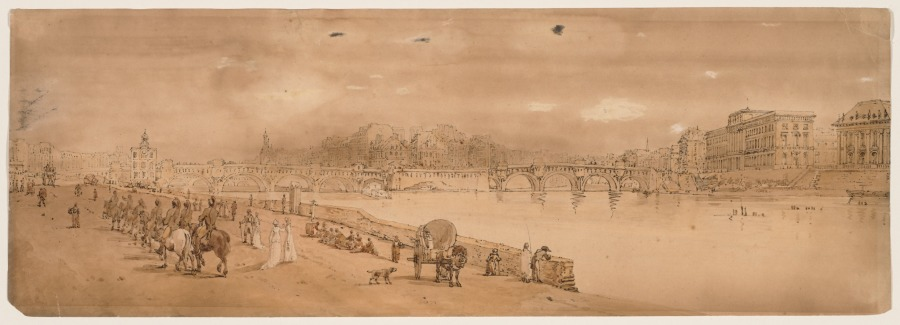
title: A Selection of Twenty of the Most Picturesque Views in Paris: View of Pont Neuf, and the Mint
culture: England, early 19th Century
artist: Thomas Girtin (British, 1775–1802)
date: 1802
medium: soft-ground etching with bistre wash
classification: Print